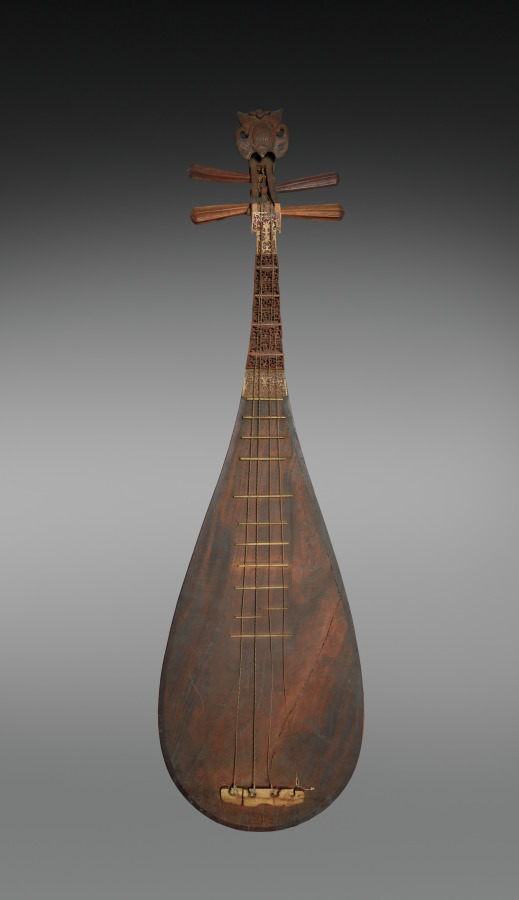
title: Pipa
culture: China, Qing dynasty (1644-1911)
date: 1800s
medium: Wood, ivory, bone, gut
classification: Musical Instrument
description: The term pipa, known since the 3rd century BC, describes the playing motion of the right hand: pi, “to play forward” (left), and pa, “to play backward” (right). A type of lute played with the fingers, it is used in opera and storytelling ensembles and has an impressive, virtuosic solo repertoire. Historic imagery, such as wall paintings, documents the spread of the pipa, along the Silk Road from western and central Asia to China. The bat finial here is a commonly used device on 19th-century Chinese lutes symbolizing good luck.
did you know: The string holder is made of bone.